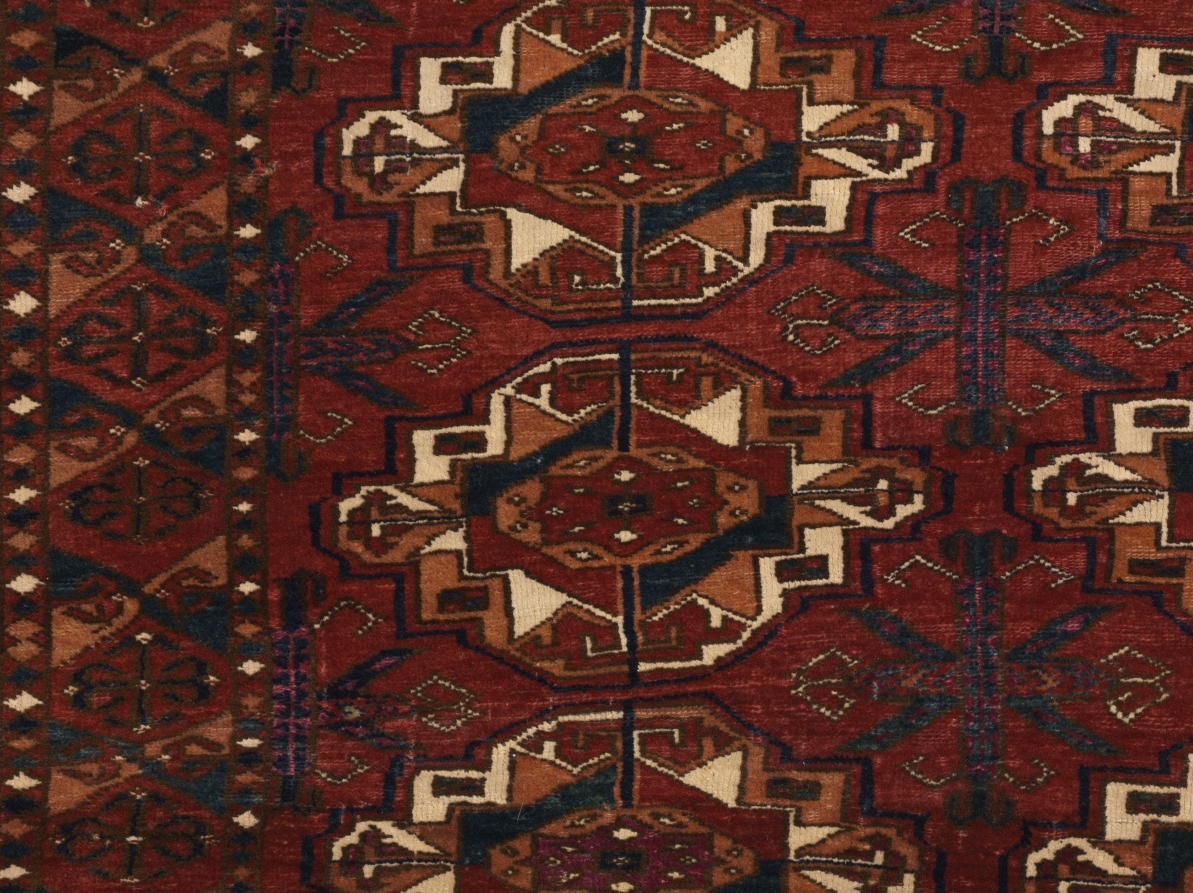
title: Turkmen Bag Face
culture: Turkmenistan, Saryk tribe of the Turkmen people (1850-1899), 19th century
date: 1800s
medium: Wool, silk, cotton; 252 symmetrical rug knots per square inch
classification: Textile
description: The front of this bag, called a bag face, displays the distinctive hallmarks of the Saryk tribe. The main guls, or lobed motifs, are subdivided in quadrants and alternate with angular minor guls in staggered rows. It is the oldest known weaving of the Saryk tribe, with a soft red ground color and white cotton and magenta silk pile highlights. Essential storage containers, bags were suspended from wall trellises inside tents and transported by pack animals during seasonal migrations. Bags were woven in one piece with pile on the upper part for the front face and plain weave on the lower part for the back face, and then folded and sewn along both sides.